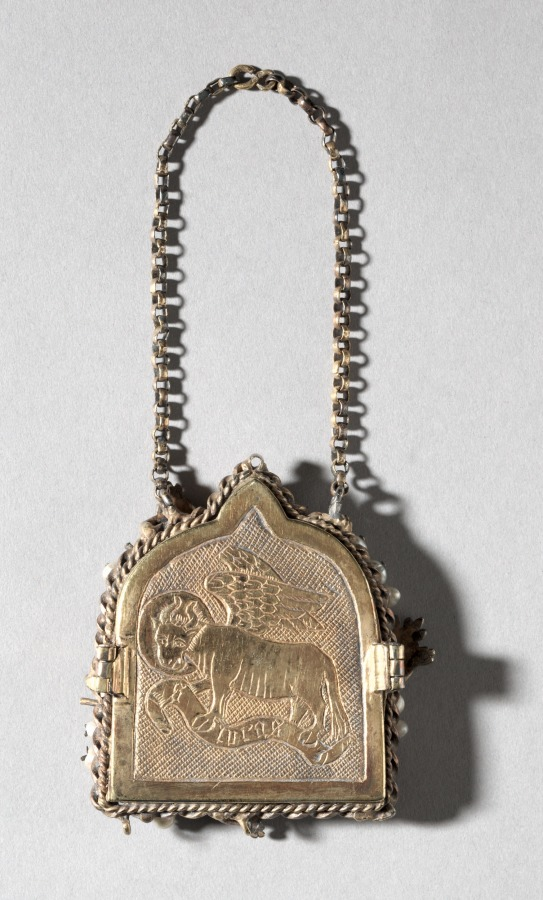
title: Pendant Icon with the Virgin "Dexiokratousa" and Frame with Winged Bull of Saint Luke on the back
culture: Byzantium (pendant); Germany, Aachen (frame), Byzantine period, 12th century (pendant); Byzantine period, 14th century (frame)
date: pendant 1100s; frame mid-1300s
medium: steatite, gilt silver, pearls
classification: Glyptic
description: This small-scale Byzantine icon depicts a half-length figure of the Virgin holding the Christ child. When the icon was mounted in its present frame by a German artist in the 14th century, it was considered to be an authentic portrait painted by Saint Luke. This claim, made in an inscription on the frame, is further emphasized by the ox, Saint Luke’s symbol, engraved on the frame’s reverse.